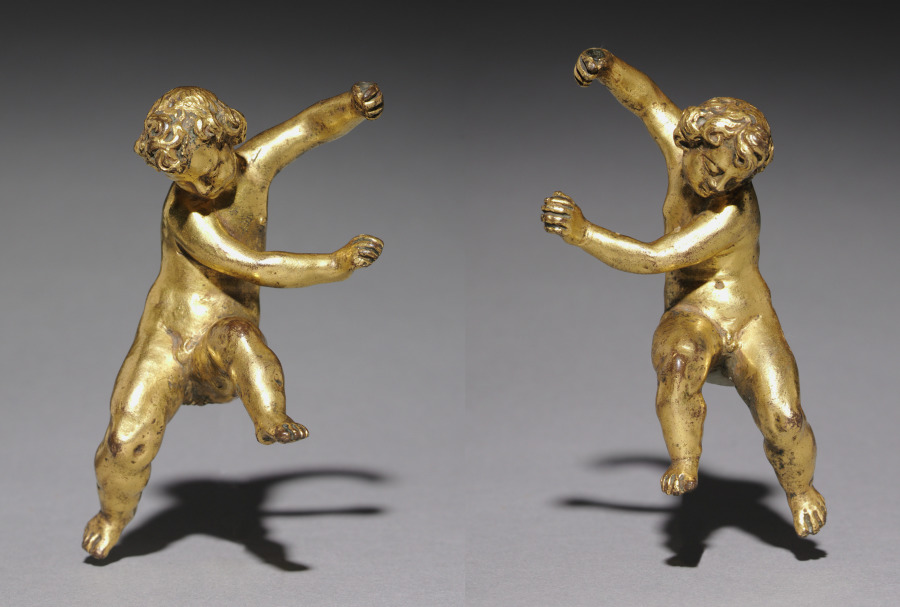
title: Pair of Putti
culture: Italy, Rome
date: late 1500s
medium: gilt bronze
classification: Sculpture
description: These gilt bronze putti, or figures of plump male children in the nude, are near mirror images of one another. Both are seated, with their arms flung to the side. Minimal detailing exists in the hands and feet, with the fingers and toes signified only by simple line indentations. The function and original placement of the putti is uncertain, but their posture and the placement of their hands suggest that originally they may have been placed in a larger statue group, perhaps holding either side of a banner, or even a piece of furniture. A will drawn up by Guglielmo della Porta in 1558 mentions the existence of bronze Passion scenes and crucifixes, suggesting that the artist may have created other small bronze groups as well. John Pope-Hennessey attributed these works to della Porta based on their similarity to the figures of Apollo and Artemis in Latona and her Children (Victoria and Albert Museum, London) and the monumental putti in his Tomb of Cardinal Paolo Cesi in Santa Maria Maggiore in Rome, although more recent research points away from della Porta as the maker. Ana Dieglio 2009